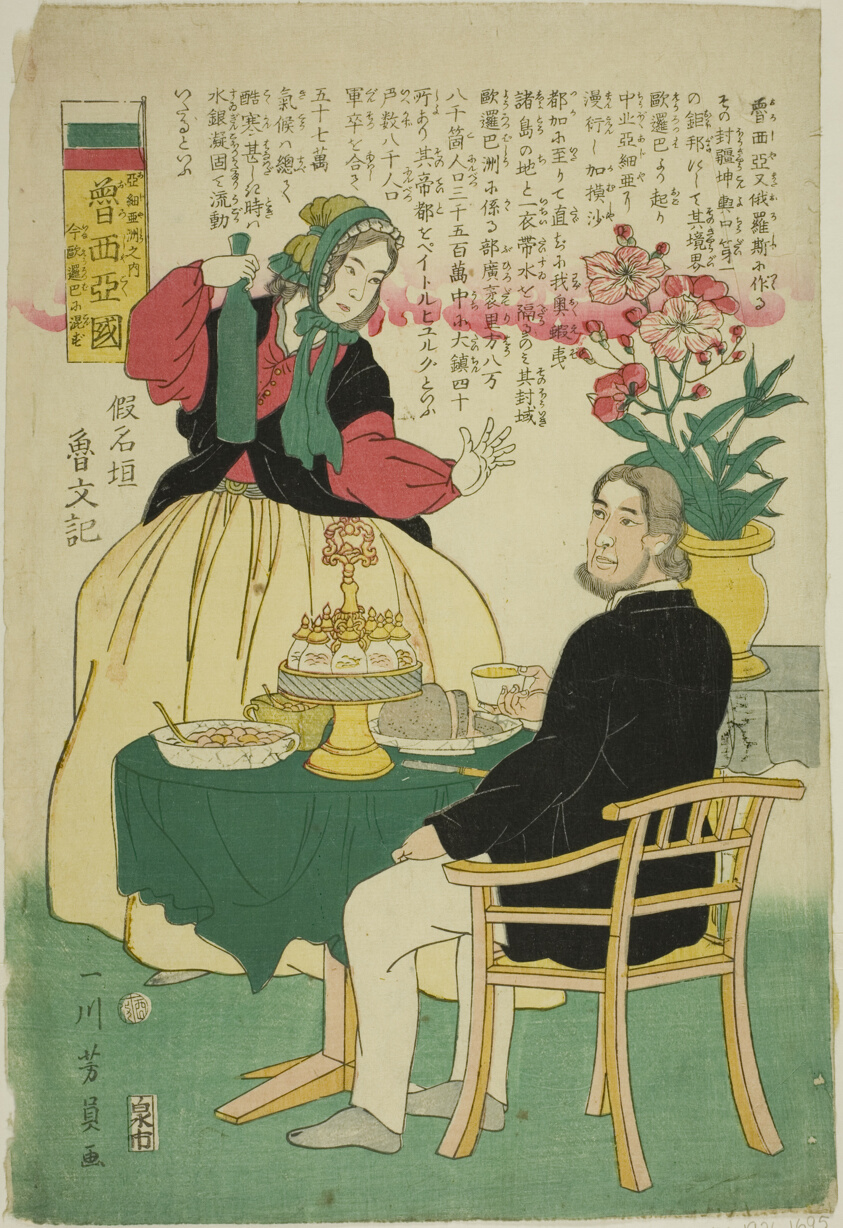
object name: Print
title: Russia (Oroshia koku), from the Countries of Asia (Ajia shu no uchi)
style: Japanese (culture or style)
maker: Utagawa Yoshikazu (Japanese, active c. 1850-70)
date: 1861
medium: Color woodblock print; oban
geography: Japan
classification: woodblock print; print; asian art